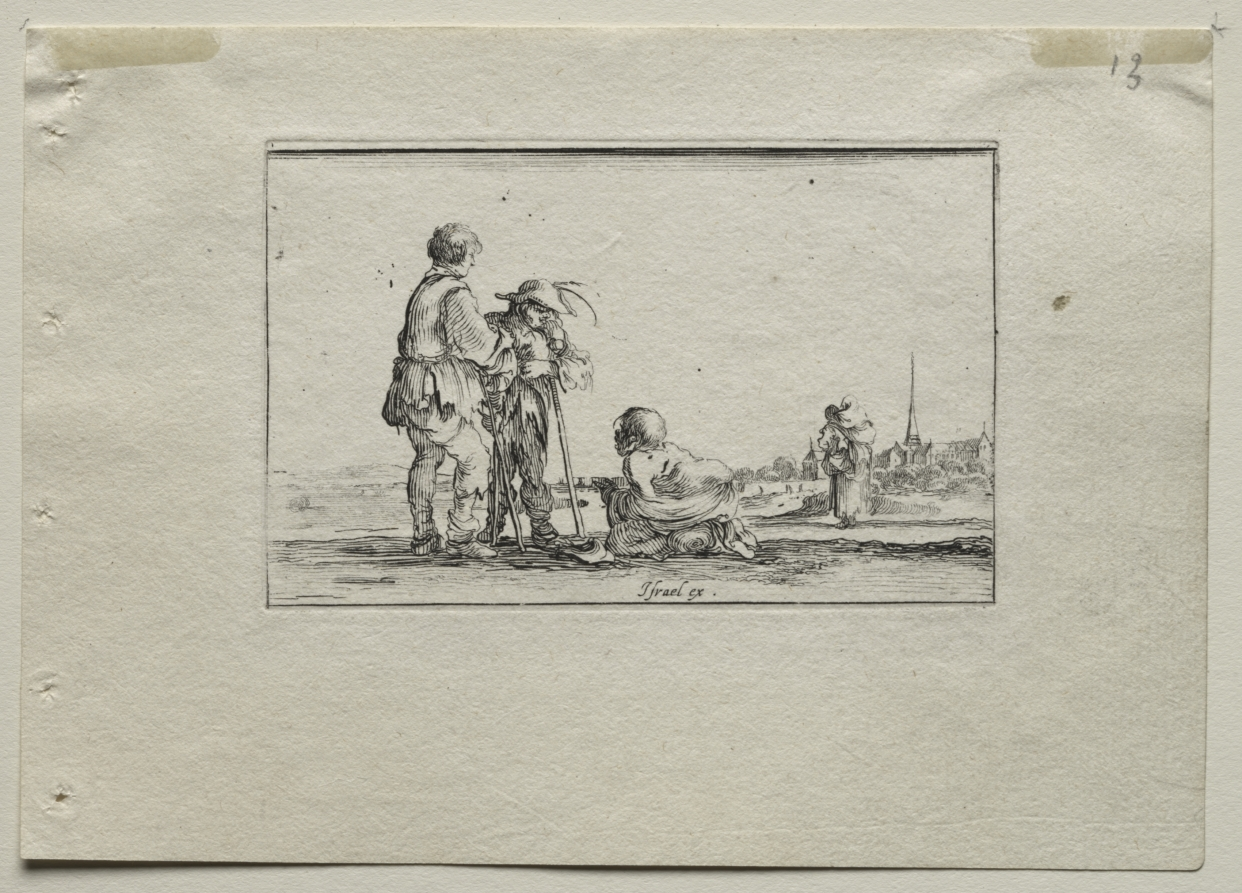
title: Caprices: Two Standing Beggars and a Cripple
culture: Italy, 17th century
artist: Stefano Della Bella (Italian, 1610–1664)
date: c. 1642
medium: etching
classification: Print